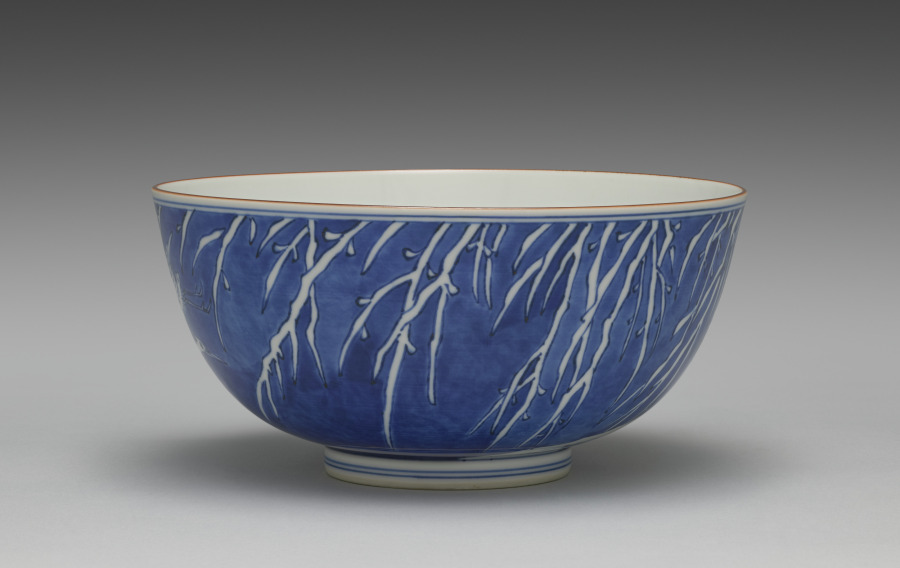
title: Sweets Bowl with Egrets and Willow in Snow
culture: Japan, Meiji period (1868–1912)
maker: Seifū Yohei III (Japanese, 1851–1914)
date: 1912–14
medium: Porcelain with underglaze blue and iron oxide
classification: Ceramic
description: For this sweets bowl, Yohei III designed a dramatic surround of egrets in a willow tree under heavy snow. The entire design is painted in cobalt blue under the transparent glaze. If one turns the bowl clockwise, two egrets come into view, one after the other. As they ascend, both struggle against the wind amid snow-laden weeping willow branches. They are followed by a stretch of willow branches that evoke the bitter cold. The sky is painted with blue washes all around the designs. The imagery culminates in a group of three egrets huddled together in the crotch of the tree. Of course, it is also possible to read the scene in the other direction, in which case the sheltering egrets look toward one of the flying egrets, who looks back at them, and it is the egret with wings outspread, looking directly down, who concludes the scene. Two thin bands of blue set off the design just under the bowl’s rim, and a band of brown iron oxide runs along the rim. Another two bands of blue run around the middle of the foot. The inside of the bowl’s box lid has an attestation by Yohei IV that it is the work of Yohei III.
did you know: This sweets bowl requires someone to rotate it to experience the birds observing one another.